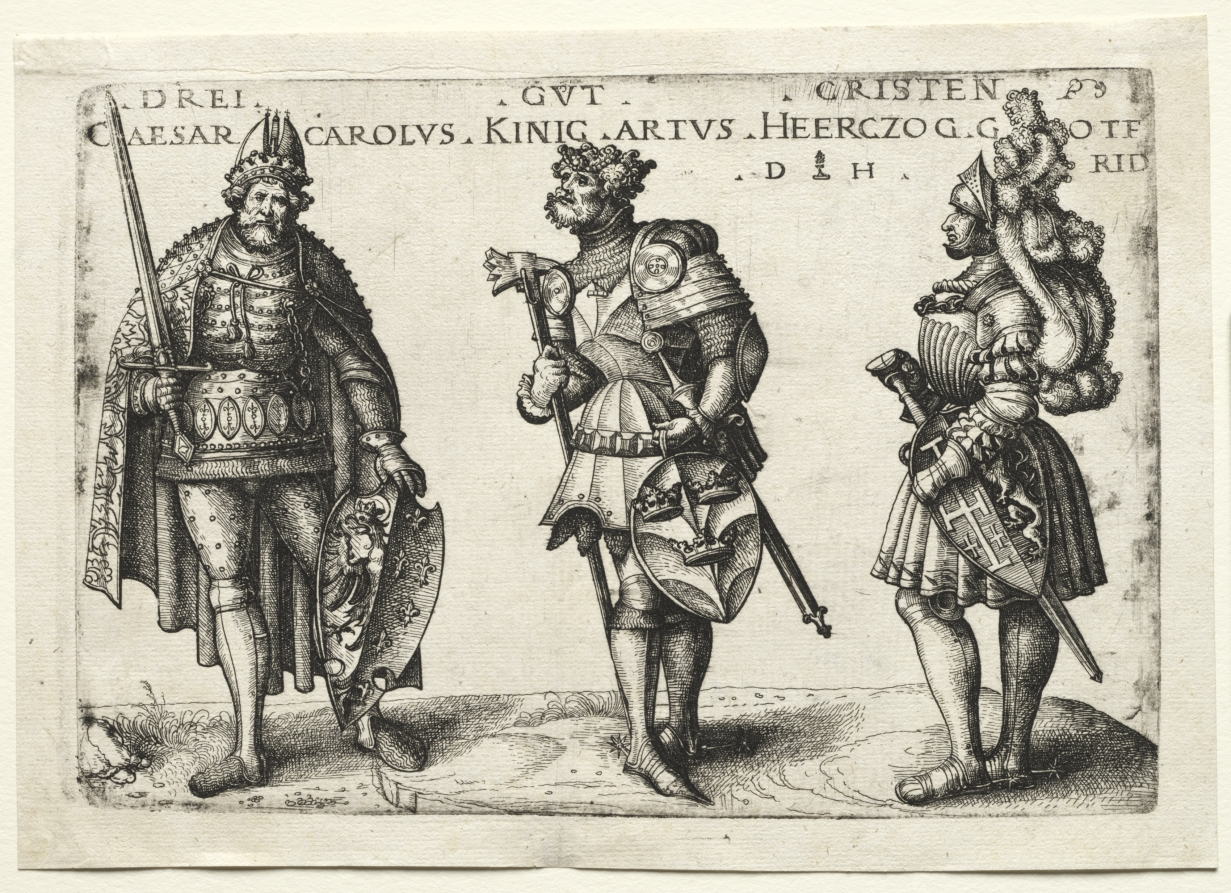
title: Three Worthy Christians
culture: Germany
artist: Daniel Hopfer (German, c. 1470–1536)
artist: after a design by Hans Burgkmair (German, 1473–1531)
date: after 1516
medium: etching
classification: Print